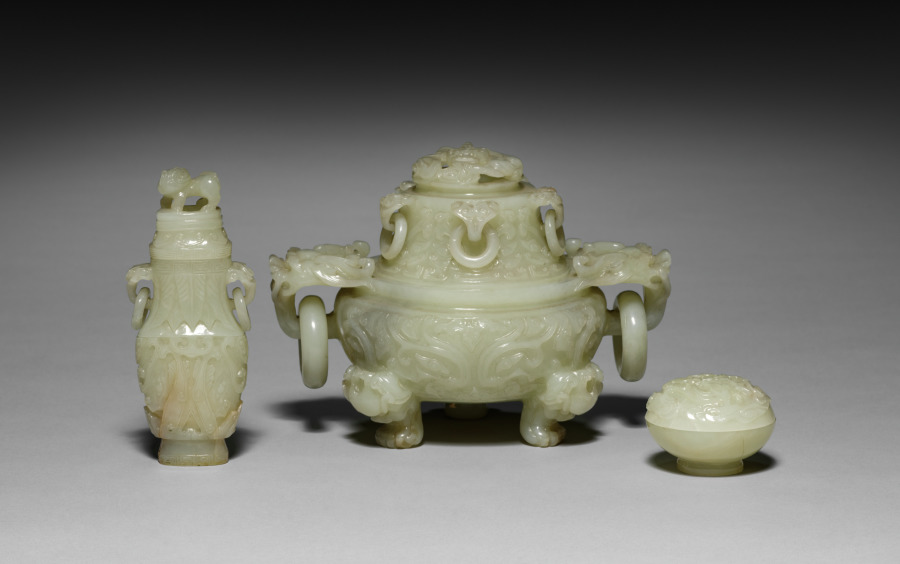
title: Chinese Jade Incense Set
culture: China, Qing dynasty (1644-1911)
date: 1644–1911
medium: jade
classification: Jade